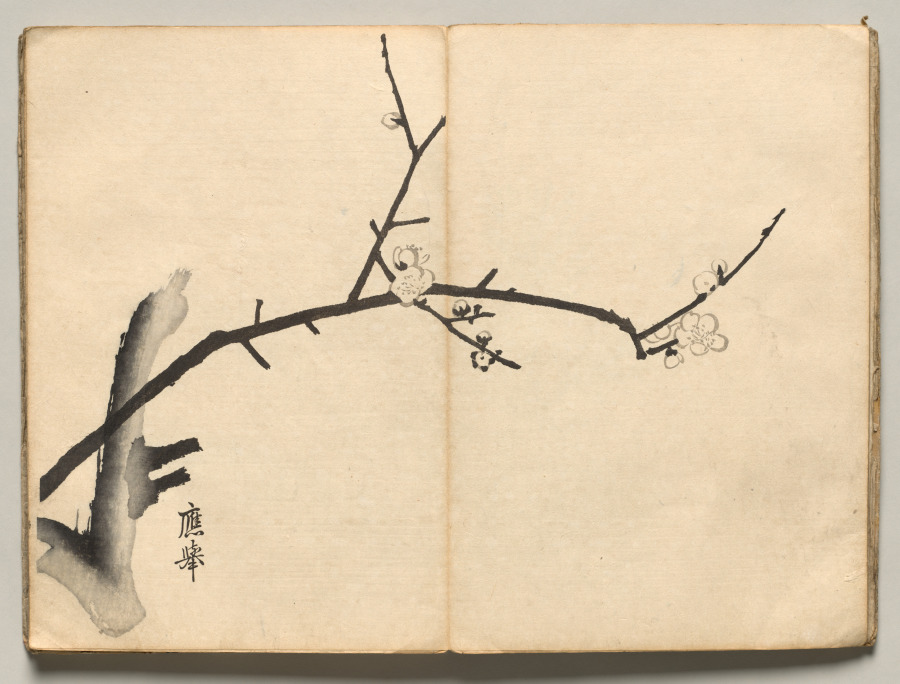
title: Plum from Ōkyo Picture Book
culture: Japan, Edo period (1615–1868)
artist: after Maruyama Ōkyo (Japanese, 1733–1795)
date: 1850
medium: accordion-style woodblock printed folding-book; ink and color on paper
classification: Bound Volume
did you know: This impression of a book of woodblock-printed designs is missing a spread that depicts a crane.